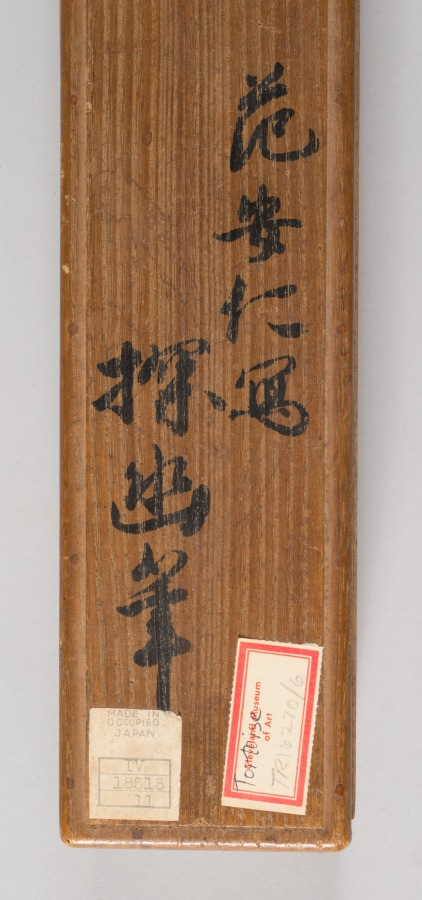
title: Turtle in a Lotus Pond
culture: Japan, Edo period (1615–1868)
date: 1700s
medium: hanging scroll; ink on paper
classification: Painting